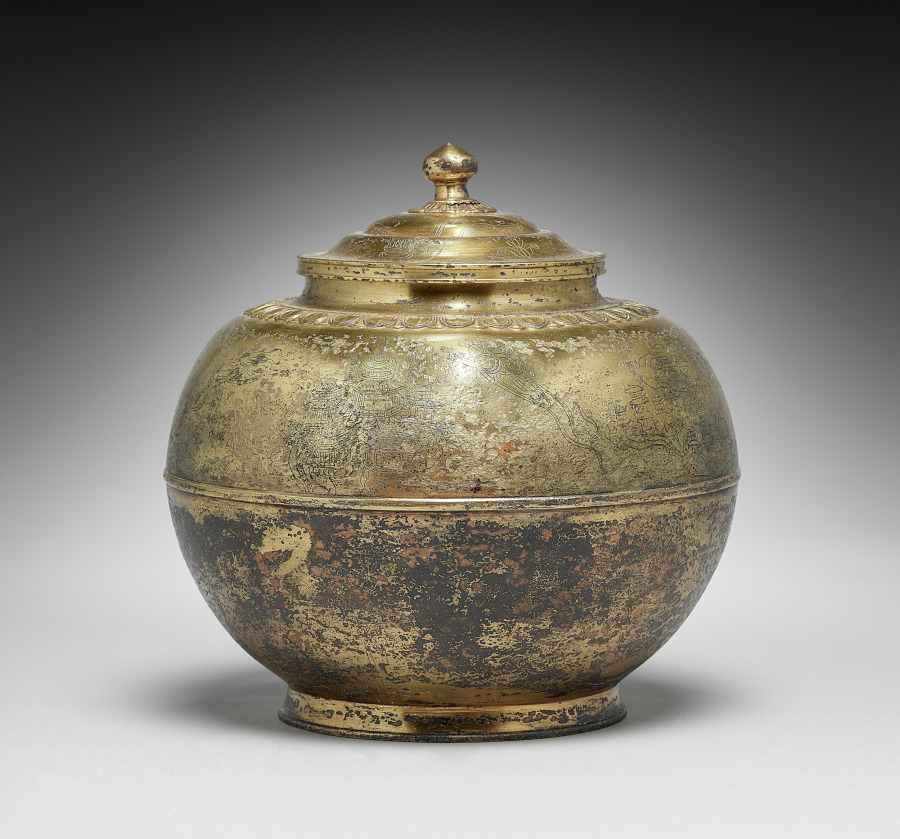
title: Cinerary Urn with Amida's Pure Land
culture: Japan, Heian period (794–1185)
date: 800s-900s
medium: gilt bronze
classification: Metalwork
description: This urn once held someone’s ashes. It is decorated with images of the Pure Land of Amida, the Buddha of Infinite Life and Light. Heian-period devotees of Amida believed that if they called upon his name with sincerity at the moment of death, they would be born into his Pure Land, also known as the Western Paradise, and thereby escape the pattern of reincarnation. As shown on the lid of the urn, in the Pure Land, musical instruments float about playing by themselves. Its palatial structures and magnificent lotus pond are described on the body of the urn.